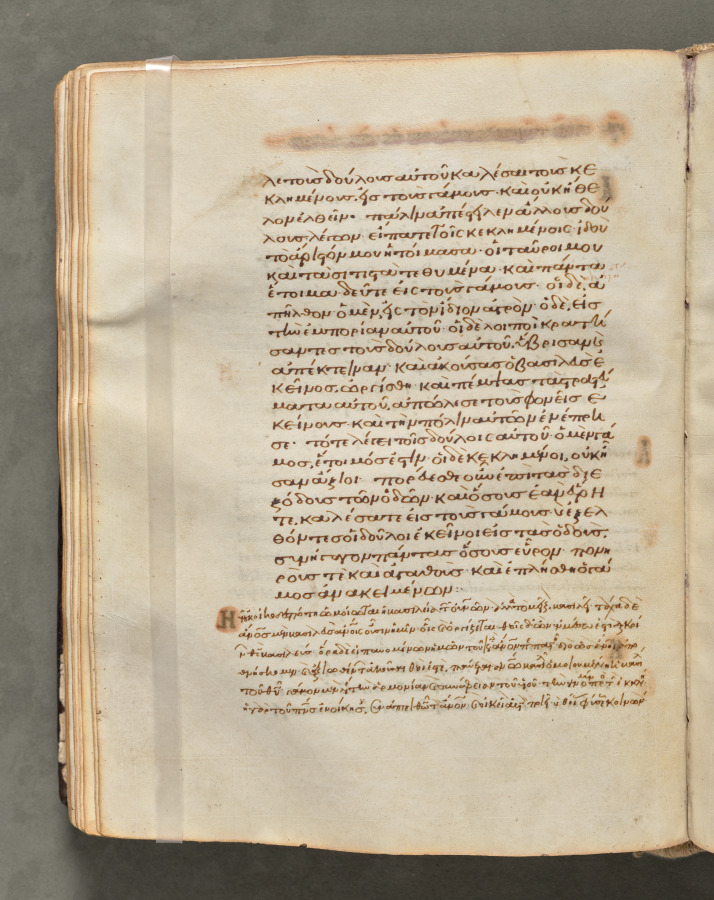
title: Text, folio 96 (verso), from a Gospel Book with Commentaries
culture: Byzantium, Constantinople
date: c. 1000–1100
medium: ink, tempera, and gold on vellum; leather binding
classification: Bound Volume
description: Each of the four gospels in this book opens on a page with brilliantly illuminated borders depicting the author of the text as well as birds-principally peacocks, symbols of the immortality of the soul-and fountains, representing the fountain of life and the salvation of the soul. This volume consists of 428 leaves with texts in Greek. Its level of sophistication suggests that it was probably written and decorated in a monastery in Constantinople.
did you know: Gospel Books were carried in procession through Byzantine churches.